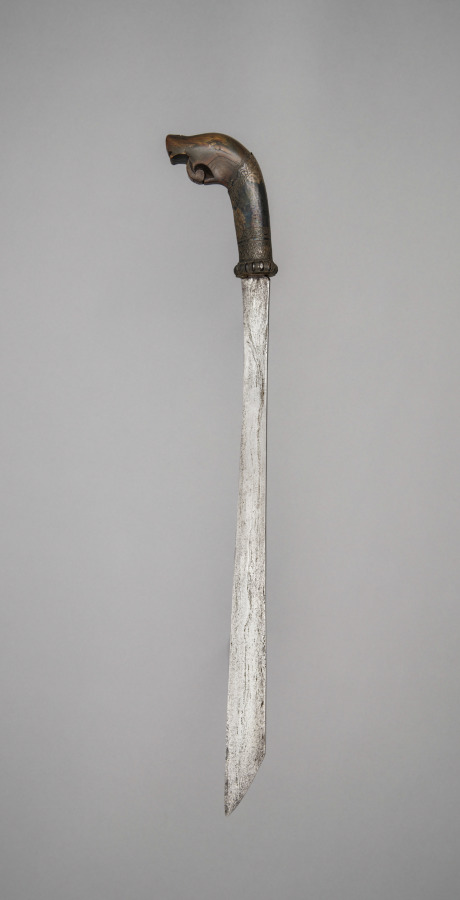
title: Sword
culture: Indonesia, Sulawesi (Celebes)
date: before 1918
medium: metal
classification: Arms and Armor